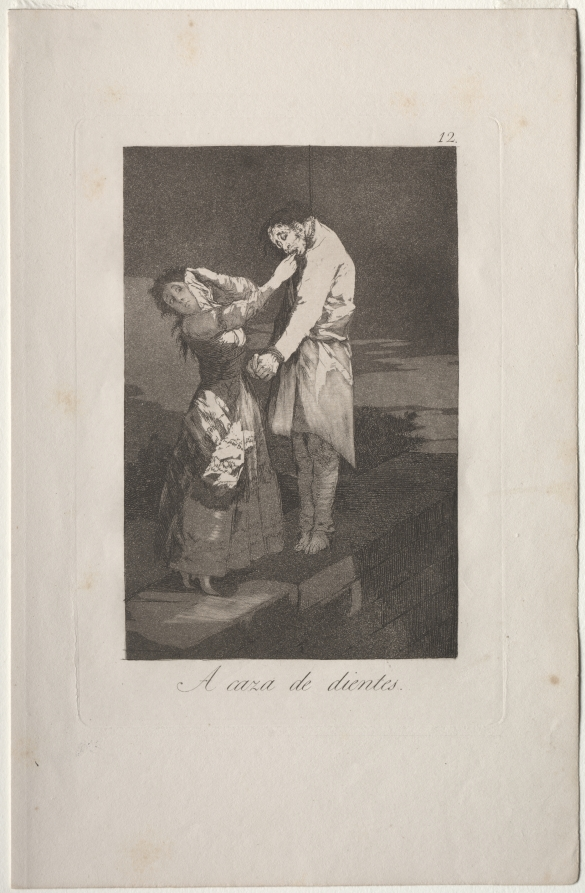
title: Out Hunting for Teeth, Plate 12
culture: Spain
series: Los Caprichos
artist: Francisco de Goya (Spanish, 1746–1828)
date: 1799 (printed c. 1855)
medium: etching and aquatint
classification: Print